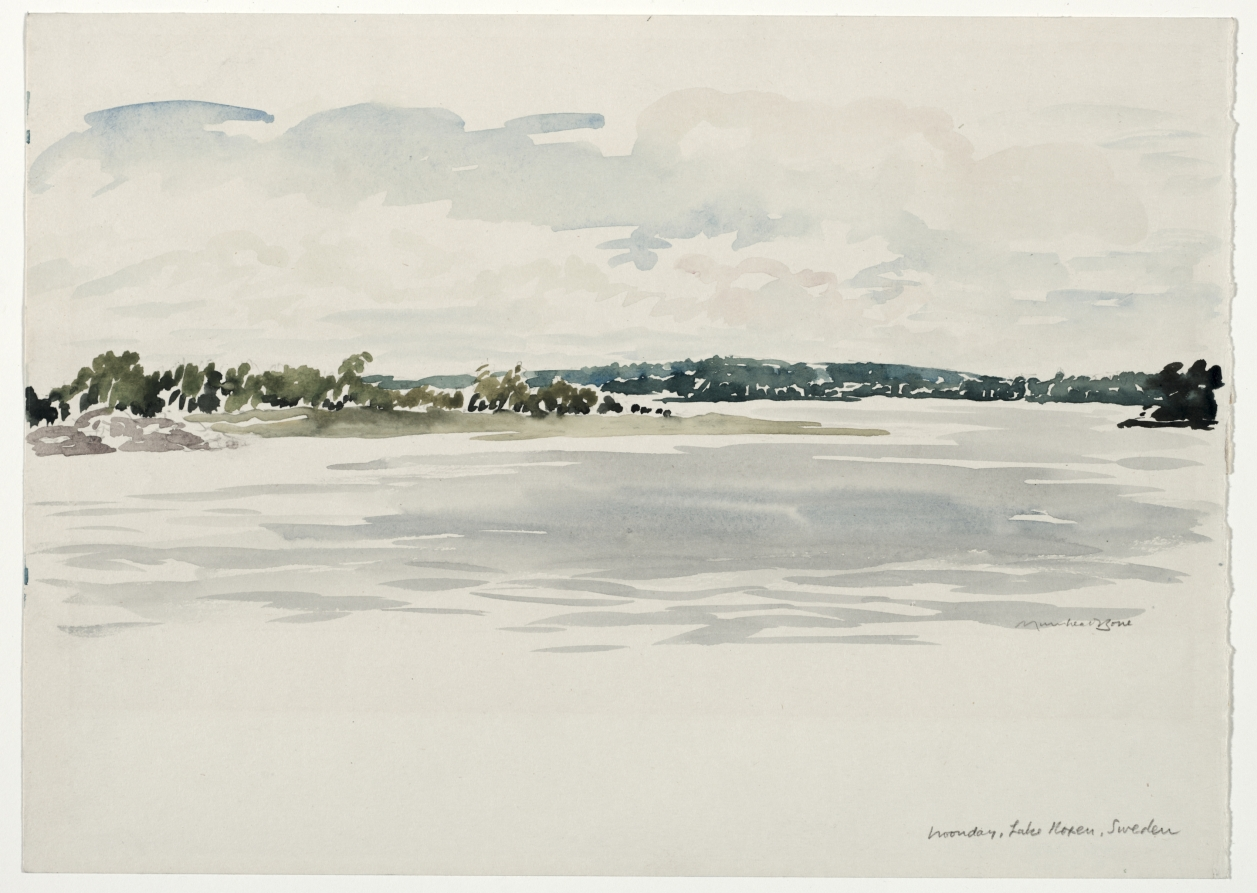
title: Noonday, Lake Noxen, Sweden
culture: England, 20th century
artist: Muirhead Bone (British, 1876–1953)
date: c. 1896–1953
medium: watercolor and graphite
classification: Drawing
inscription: Lower right, in graphite: Muirhead Bone